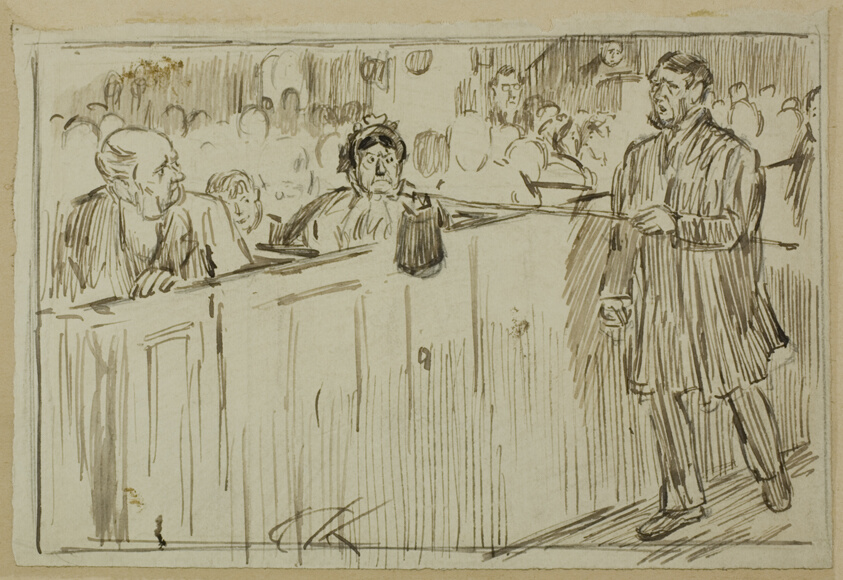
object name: Drawing and Watercolor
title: Force of Habit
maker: Charles Samuel Keene (British, 1823-1891)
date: 1870/91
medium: Pen and brown ink, with brush and brown wash, over graphite, on cream wove paper, laid down on tan wove card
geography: England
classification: pen and ink drawings; drawings (visual works); prints and drawing